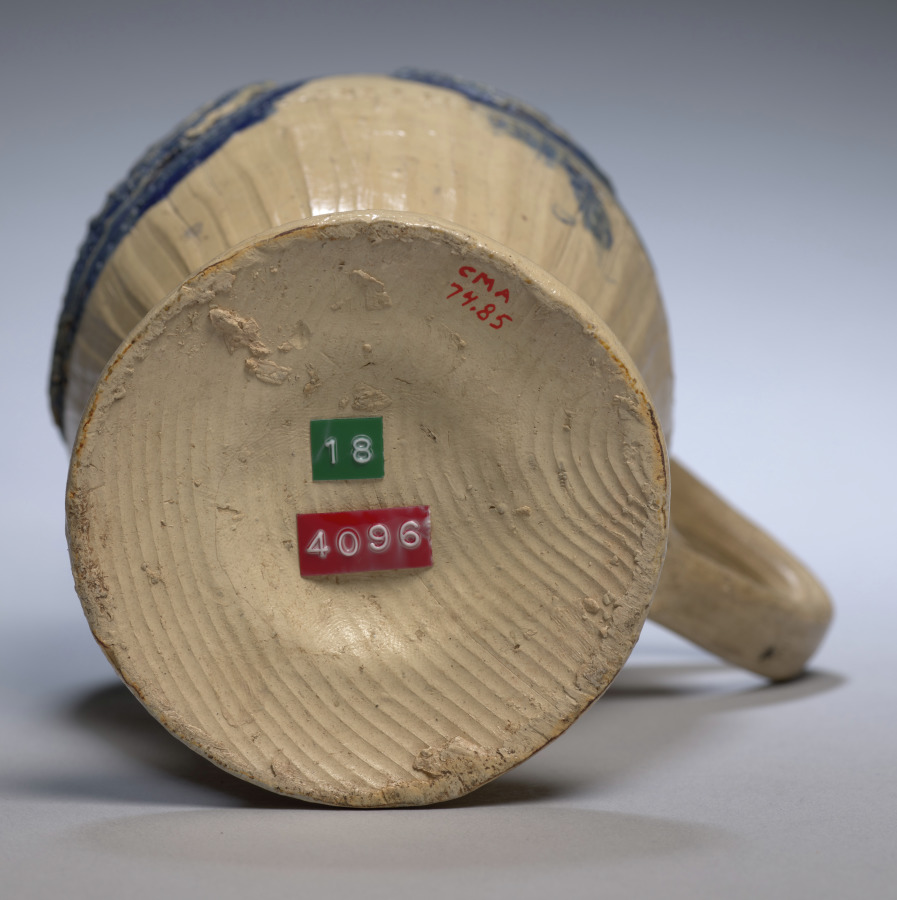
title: Light Tan Pitcher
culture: Germany, Rhenish, probably Sieberg, 19th century (?)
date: 1800s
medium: stoneware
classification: Ceramic